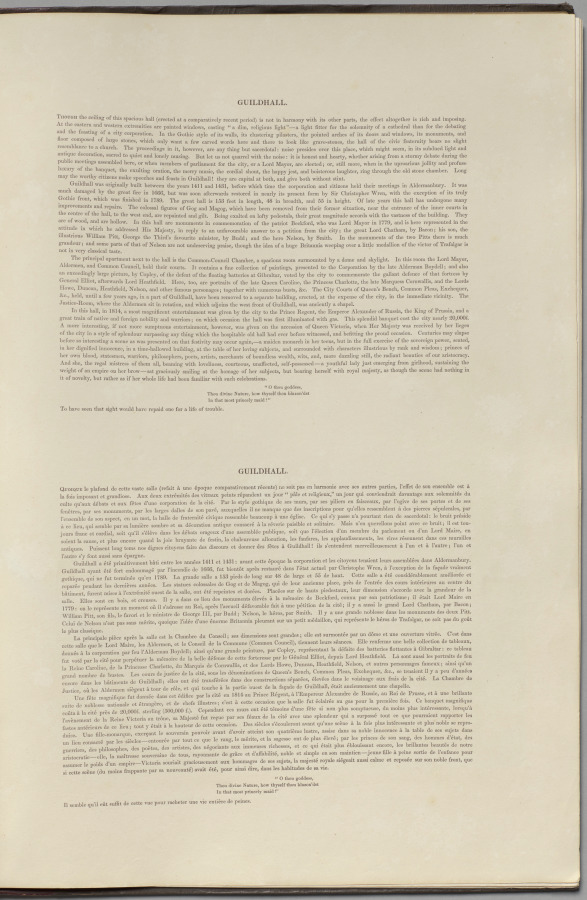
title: London As It Is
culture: England, 19th century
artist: Thomas Shotter Boys (British, 1803–1874)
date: 1842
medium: lithograph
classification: Bound Volume